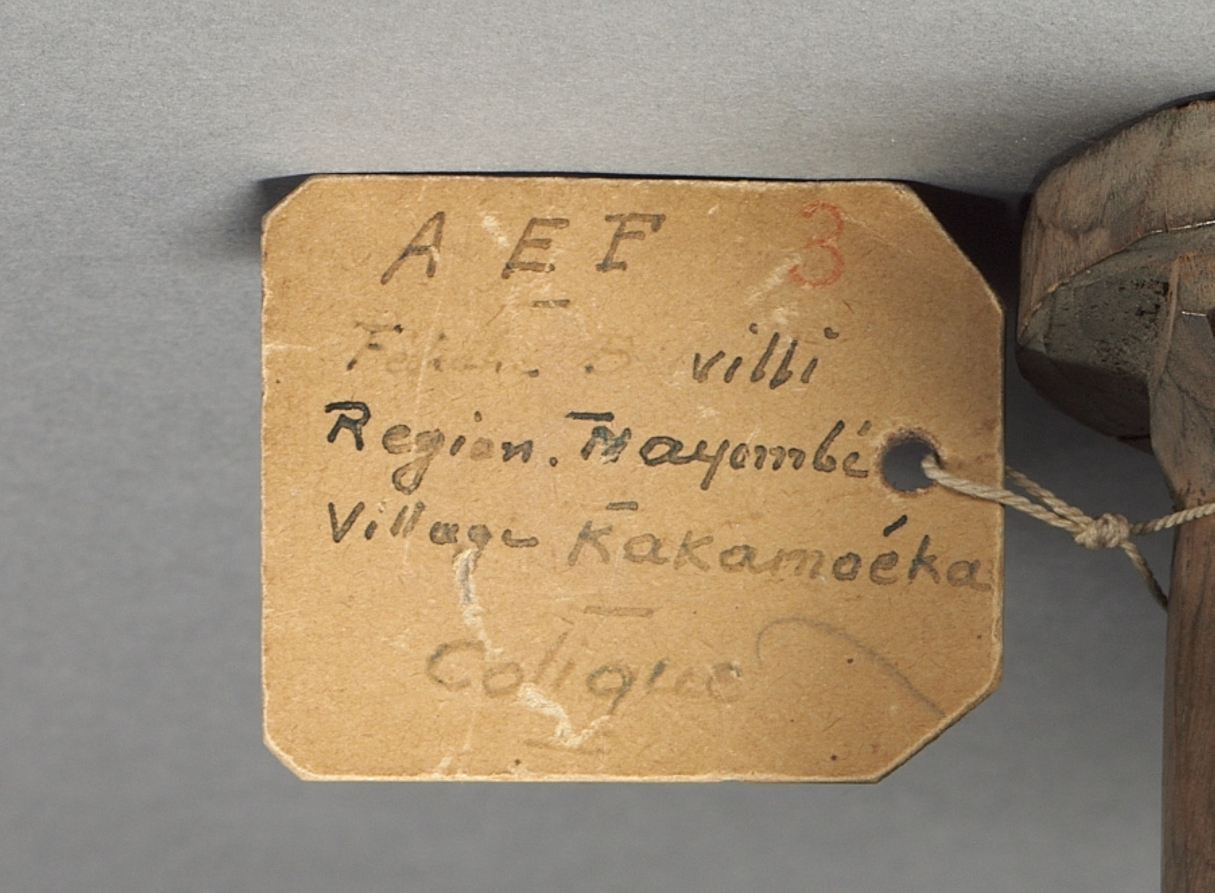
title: Power figure (nkisi)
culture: Africa, Central Africa, Republic of the Congo, Kongo-style maker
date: late 1800s–early 1900s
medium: Wood, organic materials (including resin), cloth, metalized glass, possibly porcelain, and plant fiber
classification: Sculpture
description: This figure is one of the two tallest of the seven anthropomorphic minkisi figurines previously in the Delenne collection. Identified as an nduda, two upward “guns” are attached on its side loaded with gunpowder used to shoot witches. Its label bears the word colique, a term referring to heavy pains caused by intestinal obstruction.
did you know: The object’s two small guns are pointing upward, but bears the label “colique,” a term referring to heavy pains caused by intestinal obstruction.